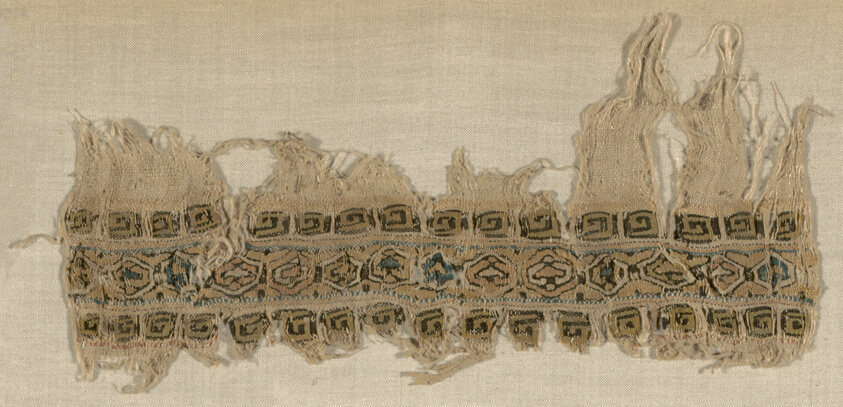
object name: Textile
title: Fragment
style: fatimid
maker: Egypt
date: Fatimid period (969–1171)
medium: Linen and silk, tapestry weave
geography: Egypt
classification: textile; weaving